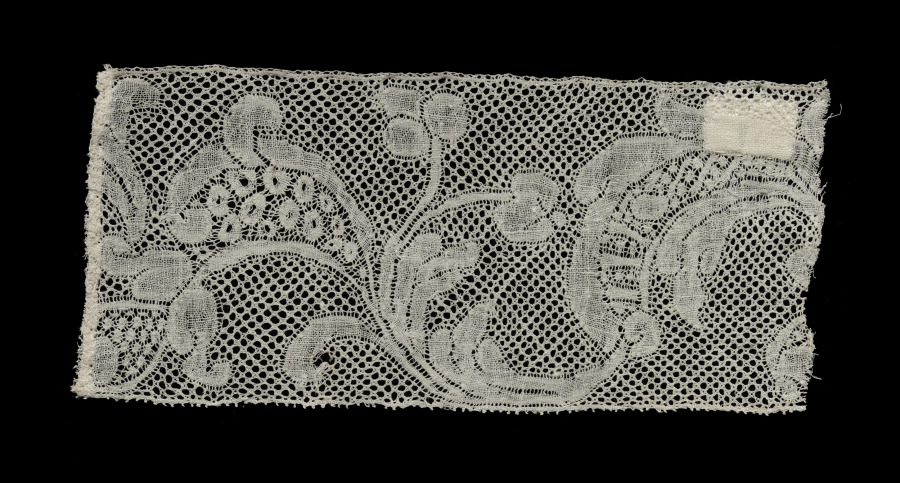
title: Lace Edging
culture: Belgium, Binche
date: 1700s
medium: Linen: bobbin lace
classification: Lace